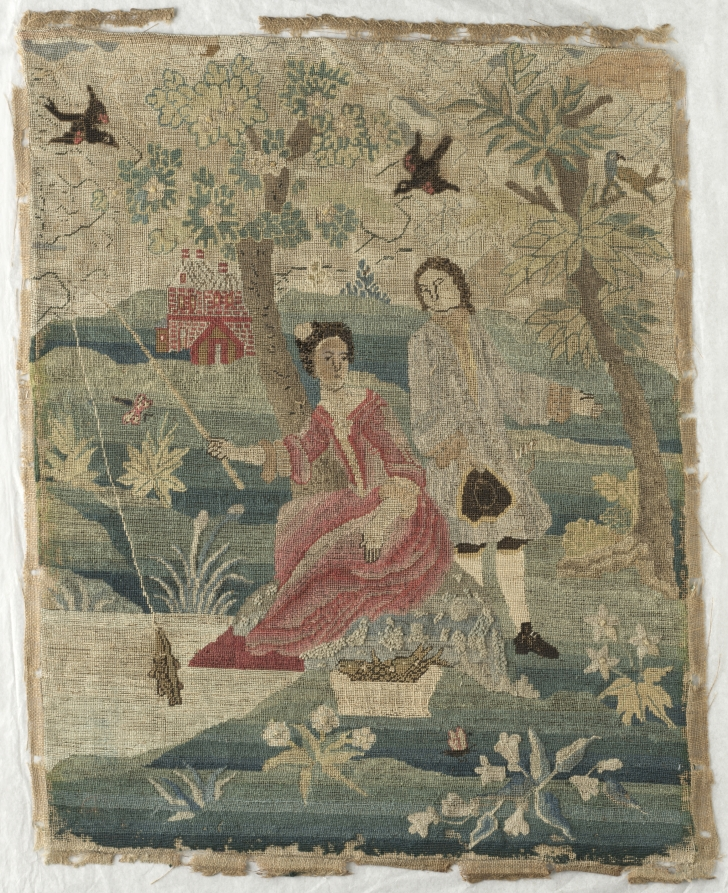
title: "Fishing Lady"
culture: America, Massachusetts, Boston, 18th century, 1st half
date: 1700s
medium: plain weave linen? with embroidery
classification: Embroidery